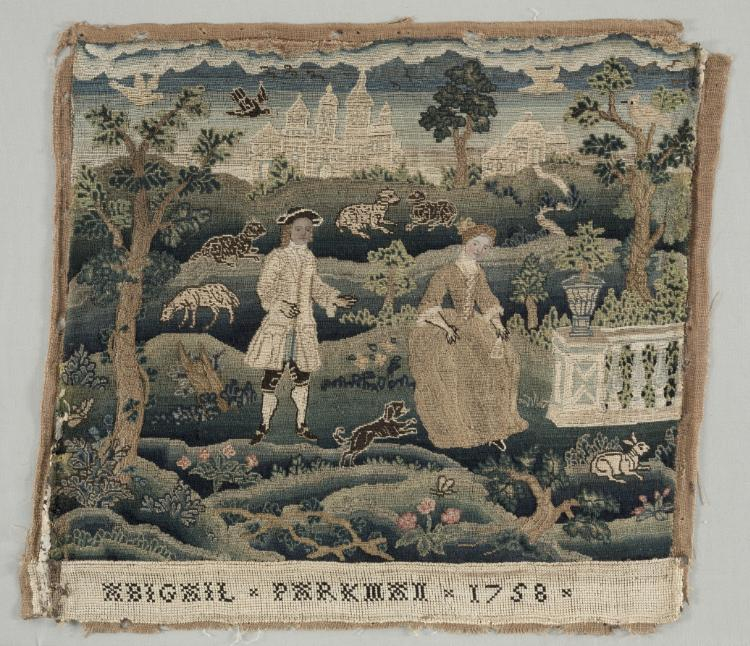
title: Abigail Parkman Embroidery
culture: America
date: early 18th century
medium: wool embroidery on canvas, tent stitch, petit point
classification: Embroidery